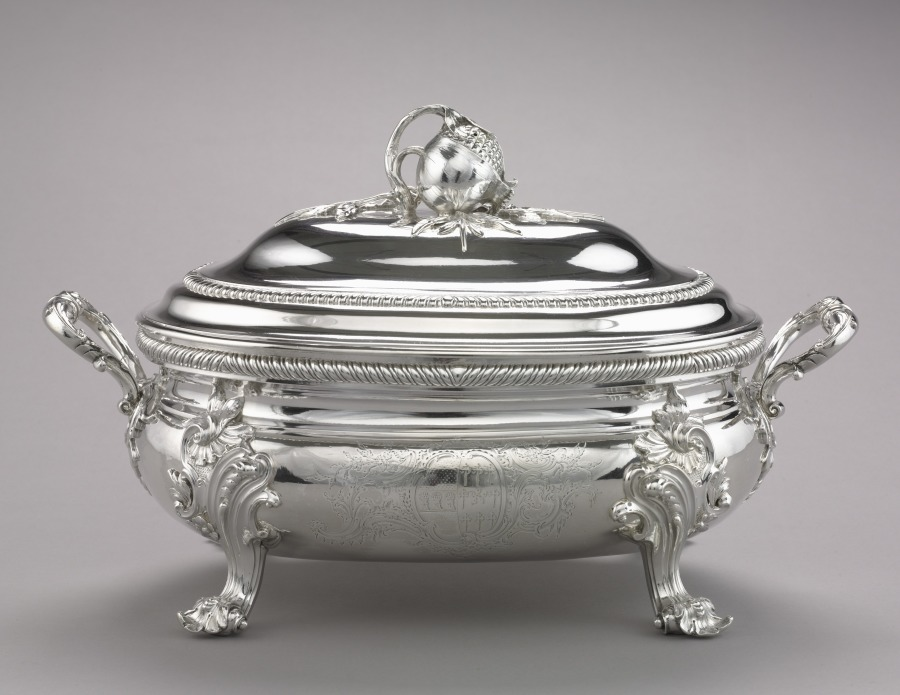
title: Covered Tureen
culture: England, 18th century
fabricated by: Edward Wakelin (British, 1784)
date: 1753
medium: silver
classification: Silver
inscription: engraved coat of arms of Admiral Edward Vernon of Nacton (1684-1757) and his wife Sarah, daughter of Thomas Best. Engraved on cover is Vernon crest, a woman holding a scythe.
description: A very successful silversmith, Edward Wakelin may have been more a businessman than a craftsman or designer.